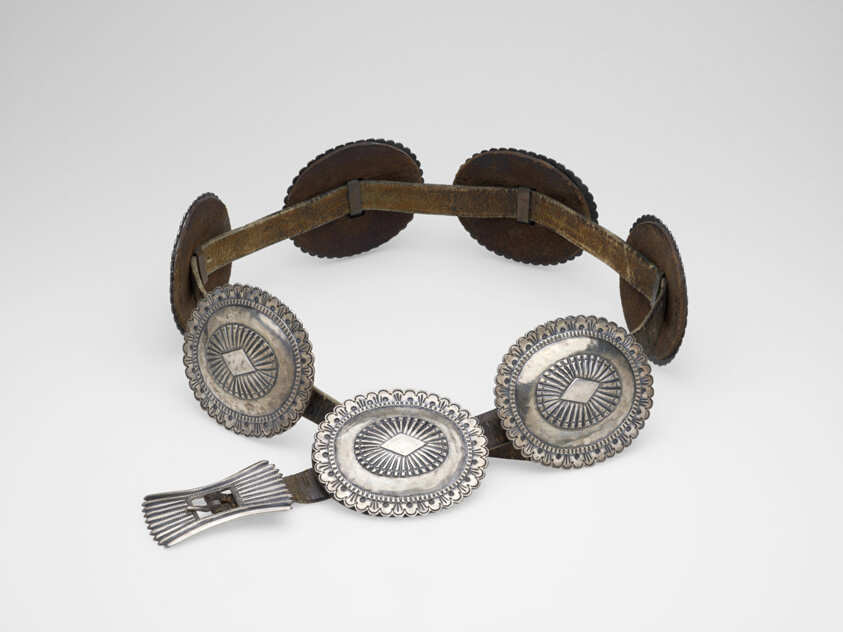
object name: Costume and Accessories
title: Concho Belt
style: navajo, dine, americas, native american, native north american, Arts of the Americas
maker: Navajo (Diné) (Northern New Mexico or Arizona, United States)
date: 1880s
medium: Silver and leather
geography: New Mexico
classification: belts (costume accessory); art of the americas; costume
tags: costume, geometric, silver (color), ornaments